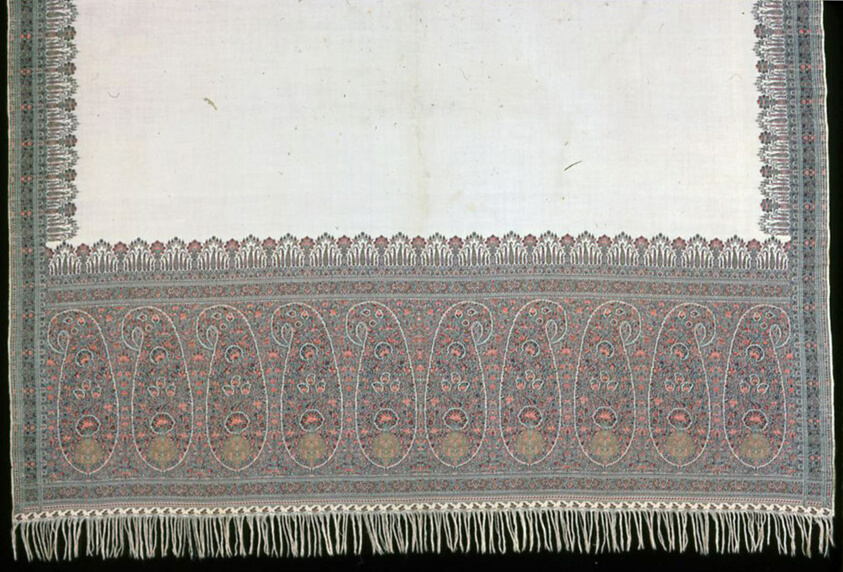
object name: Textile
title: Long Shawl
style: 19th century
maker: France or Scotland, Paisley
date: 1825/75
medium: Wool and silk, weft-float faced 1:3 'Z' twill weave with supplementary patterning wefts bound in weft-float faced 1:3 'Z' twill interlacings; main warp fringe; woven on loom with Jacquard attachment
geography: France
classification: costume accessory; weaving; textile; costume - weaving; costume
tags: paisley, fashion, floral motifs